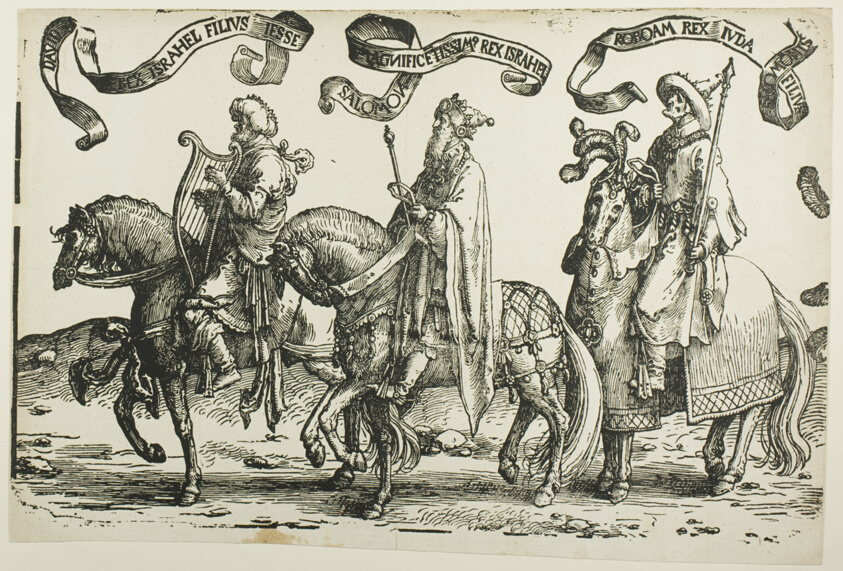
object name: Print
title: David, Solomon, Rehoboam, plate one, from The Twelve Kings of Israel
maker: Lucas van Leyden (Netherlandish, c. 1494-1533)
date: c. 1520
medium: Woodcut in black with touches of pen and brown ink on buff laid paper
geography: Netherlands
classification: woodcut; print; prints and drawing